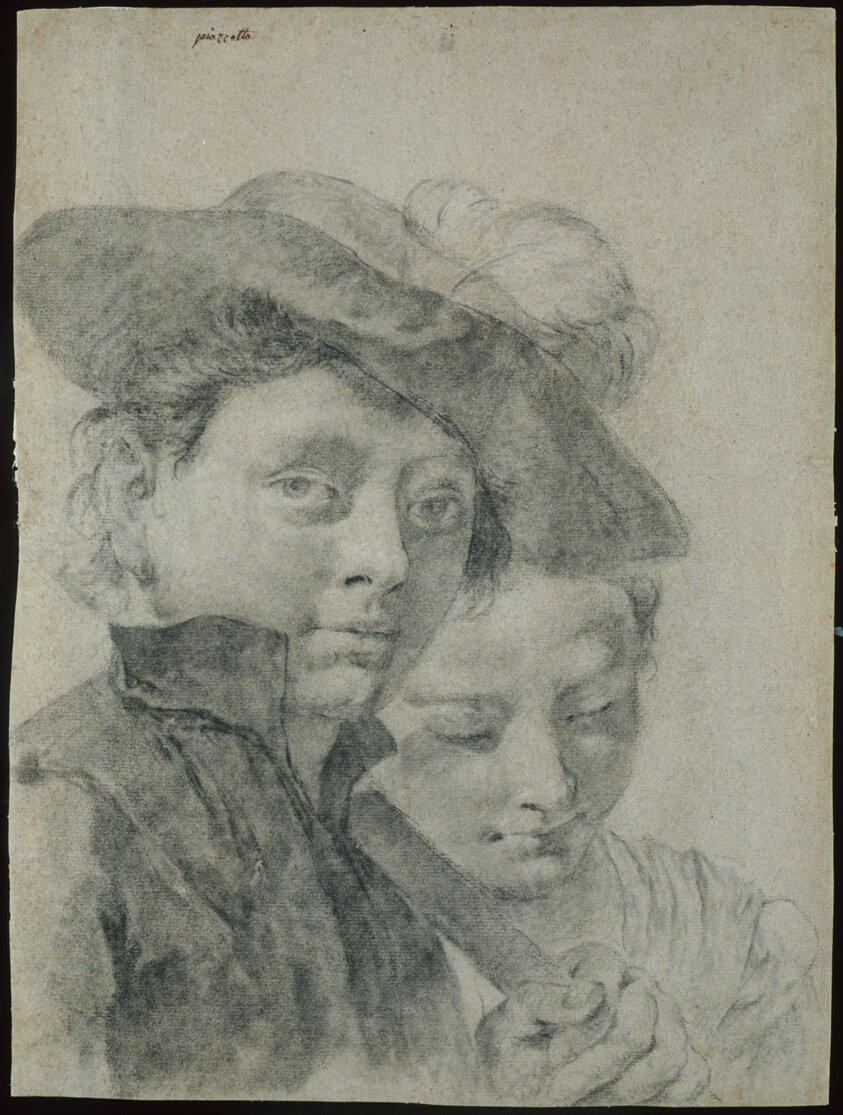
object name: Drawing and Watercolor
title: A Young Boy Wearing a Plumed Hat, and a Young Girl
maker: Giovanni Battista Piazzetta (Italian, 1682-1754)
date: 1735/40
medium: Charcoal with stumping, with black chalk, heightened with white chalk, on blue laid paper, tipped on to beige Japanese paper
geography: Italy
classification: chalk; drawings (visual works); prints and drawing